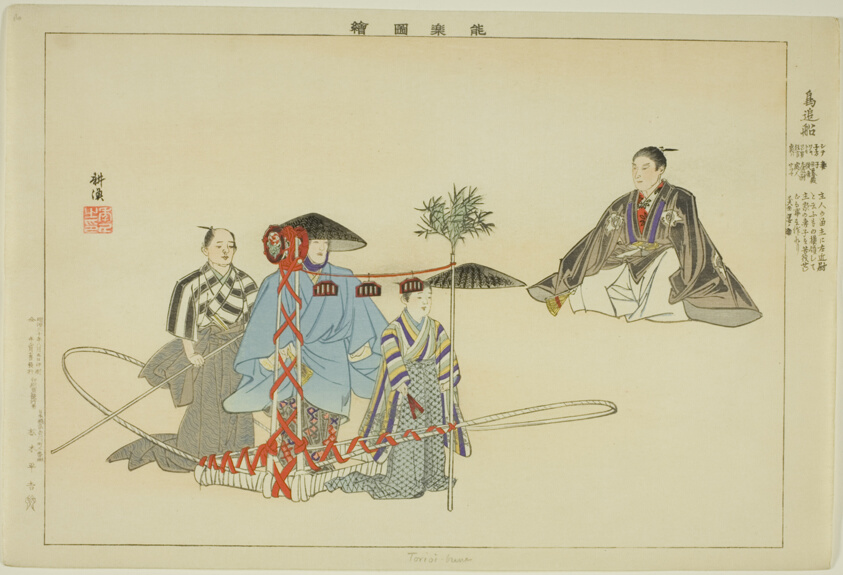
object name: Print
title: Tori-oi-bune, from the series "Pictures of No Performances (Nogaku Zue)"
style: Japanese (culture or style)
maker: Tsukioka Kogyo; Japanese, 1869-1927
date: 1898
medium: Color woodblock print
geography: Japan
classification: woodblock print; print; asian art